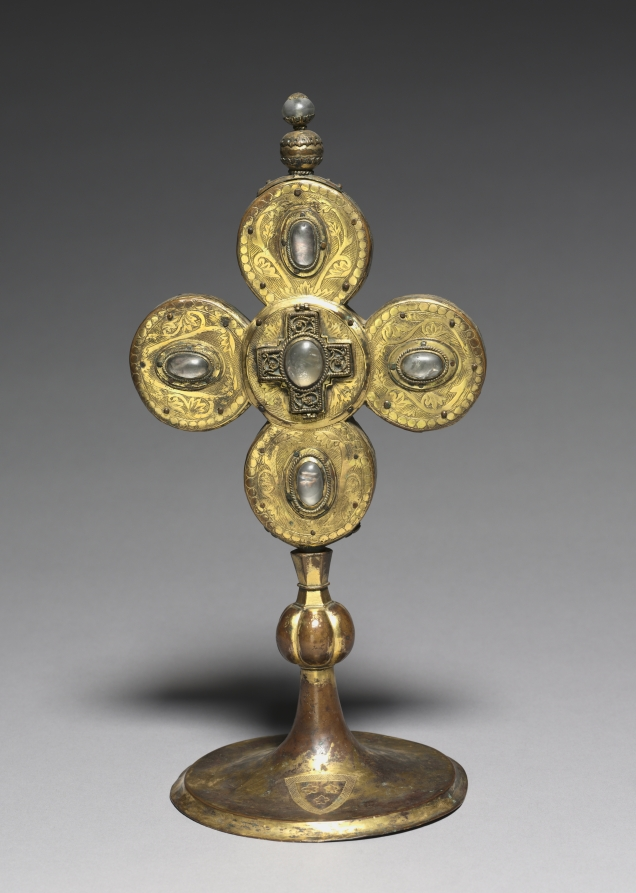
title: Reliquary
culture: France, Gothic period, 13th century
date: 1200–1300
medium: copper: gilded, engraved; rock crystal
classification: Metalwork